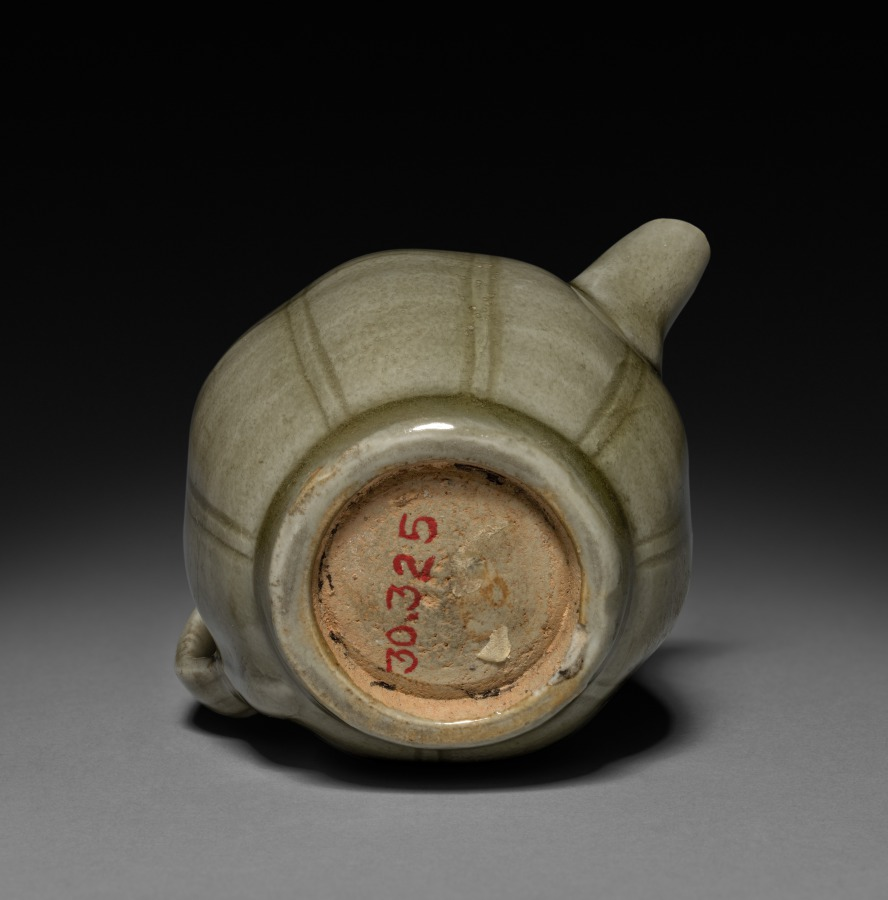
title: Wine Pot: Southern Celadon Ware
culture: China, Southern Song Dynasty (1127-1279) - Yuan Dynasty (1271-1368)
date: 1200s-1300s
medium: glazed porcelain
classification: Ceramic